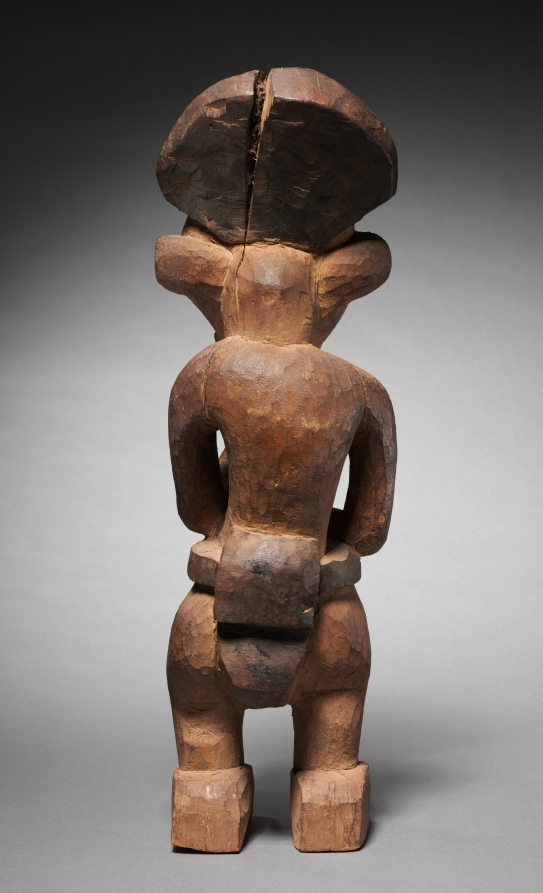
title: Royal Retainer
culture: Equatorial Africa, Cameroon, Bamum, early 20th century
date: early 1900s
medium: wood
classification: Sculpture